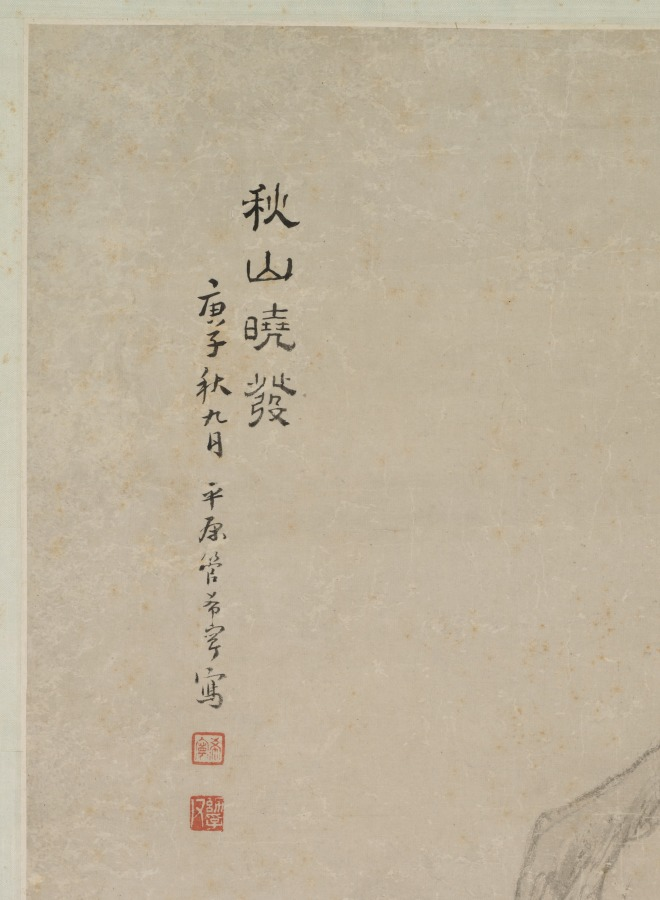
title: Landscape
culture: China, Qing dynasty (1644-1911)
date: 1644–1911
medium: hanging scroll, ink and slight color on paper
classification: Painting